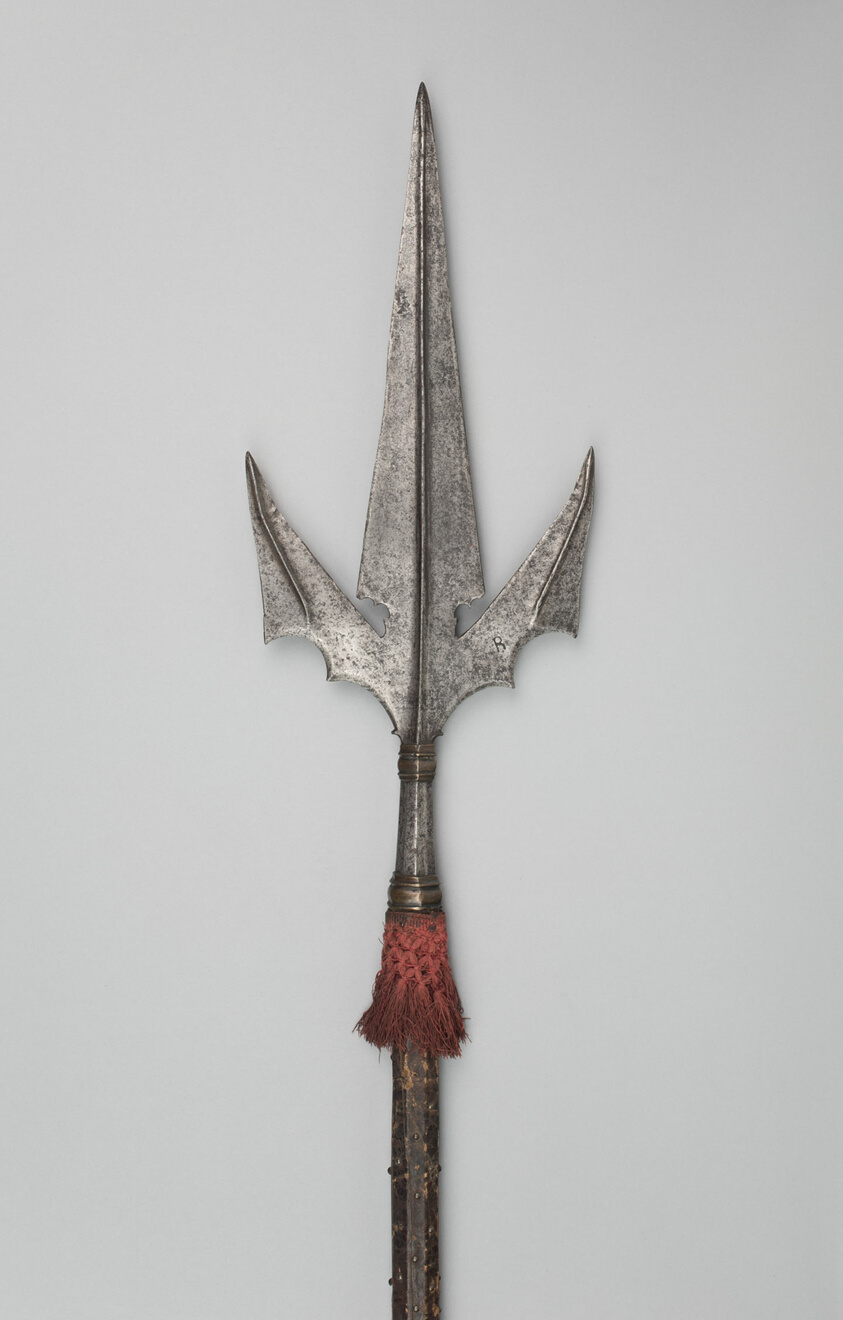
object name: Arms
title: Corsesca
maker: Italian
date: c. 1540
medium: Steel, leather covered wood, latten (copper alloy), brass, and tassel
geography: Italy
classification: edged weapon-staff; arms; arms and armor